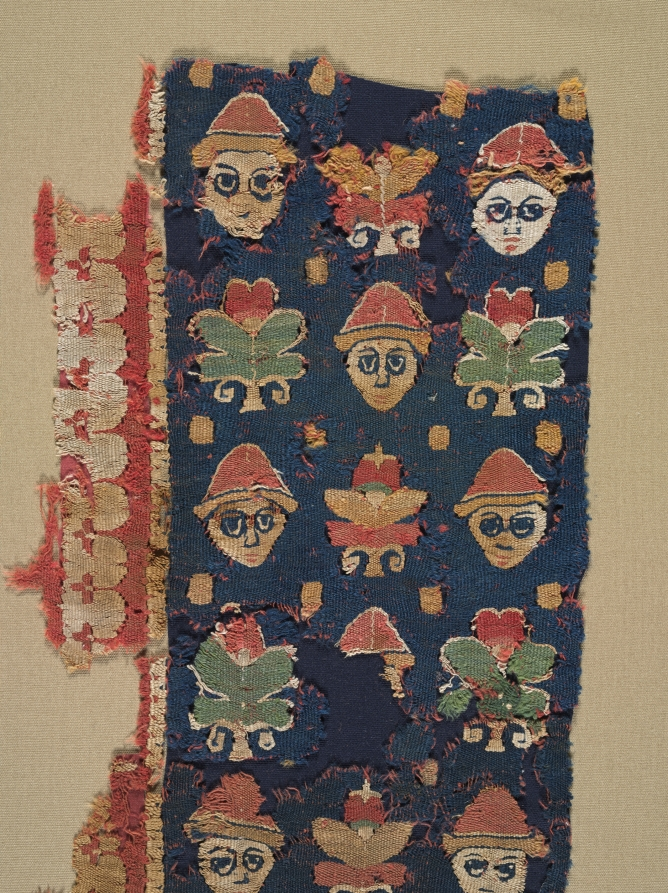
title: Border of Heads and Palmettes from a Large Hanging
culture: Egypt, Antinoë, Byzantine period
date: 500s CE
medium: Dyed wool, undyed linen; slit-tapestry weave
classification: Textile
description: Heads with caps facing front alternate with palmette (fan-shaped) leaves on a rich blue ground—a popular border design for luxurious woolen hangings whose field patterns often incorporated Iranian artistic features. An alternating red and white foliate (leaflike) design forms the secondary border.